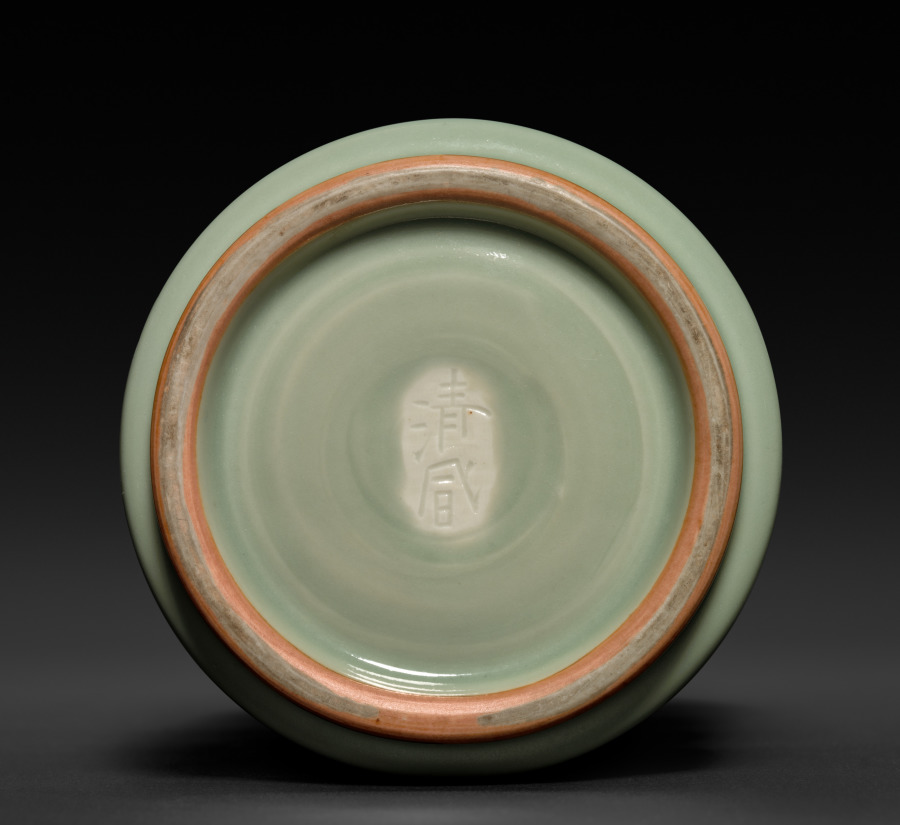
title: Tong-Shaped Vase with Flowers and Grasses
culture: Japan, Taishō period (1912–26) or Shōwa period (1926–89)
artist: Seifū Yohei IV (Japanese, 1872–1951)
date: 1914–46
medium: Porcelain with molded and carved design and green glaze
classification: Ceramic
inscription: 清風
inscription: 彫画 / 青磁花瓶 / 清風造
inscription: 青磁花瓶 / 彫画 【印】清風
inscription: 清風造 【印】成山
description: Many of the vases created by Yohei III and IV were made with reference to and in emulation of Chinese ceramics in both form and glazing. The vessel type called tongping, pronounced tōbin in Japanese, is tall and cylindrical, like the thick length of bamboo referenced in the shape of the ideograph tong 筒. Unlike the ancient gu, hu, and guan, this form did not emerge in China until the Ming dynasty, and many such vases date to the early Qing dynasty. Two green-glazed vases, CMA 2022.225 by Yohei III and this one by Yohei IV, are interpretations of this form. Yohei III’s version has slightly hunched shoulders and is somewhat wider at the top below the small neck and lip. Yohei IV’s vase is more angular. The wide rack of molded cloud encircling the Yohei III vase rises subtly from very low relief banding above and below it, accentuating the vessel’s rounded edges and complementing the form. In contrast, the allover flower vine pattern on the body and “seven treasures” pattern at the collar of the vase by Yohei IV evokes a garment’s cuffed sleeve, like the common English appellation for this type of vessel—“sleeve vase.”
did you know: Seifū Yohei IV continued to create works in the studio’s signature colors but also produced pieces with strong color and flare that were his interpretations of Qing dynasty (1644–1911) glazes.